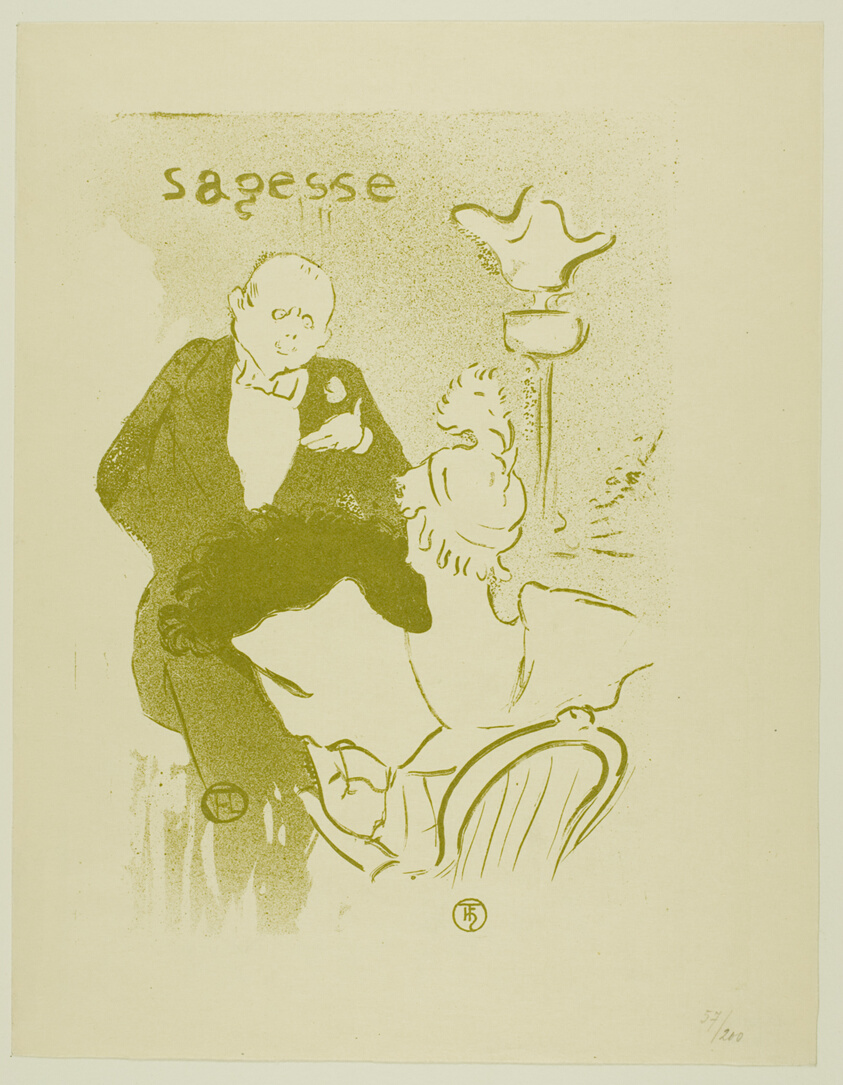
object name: Print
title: Wisdom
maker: Henri de Toulouse-Lautrec (French, 1864-1901)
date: 1893, printed and published 1927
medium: Color lithograph on cream wove paper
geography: France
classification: lithograph; print; prints and drawing